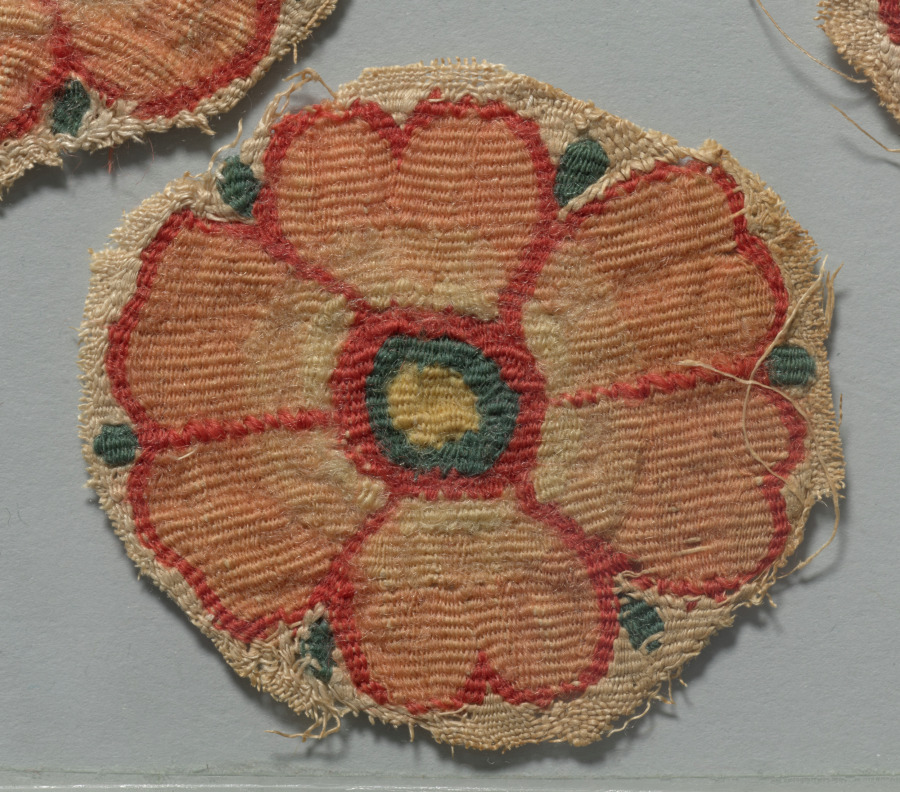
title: Fragments from a Curtain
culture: Egypt, Byzantine period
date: 300s–500s CE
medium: tapestry (originally inwoven in tabby ground, applied to plain tabby linen); linen and wool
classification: Textile